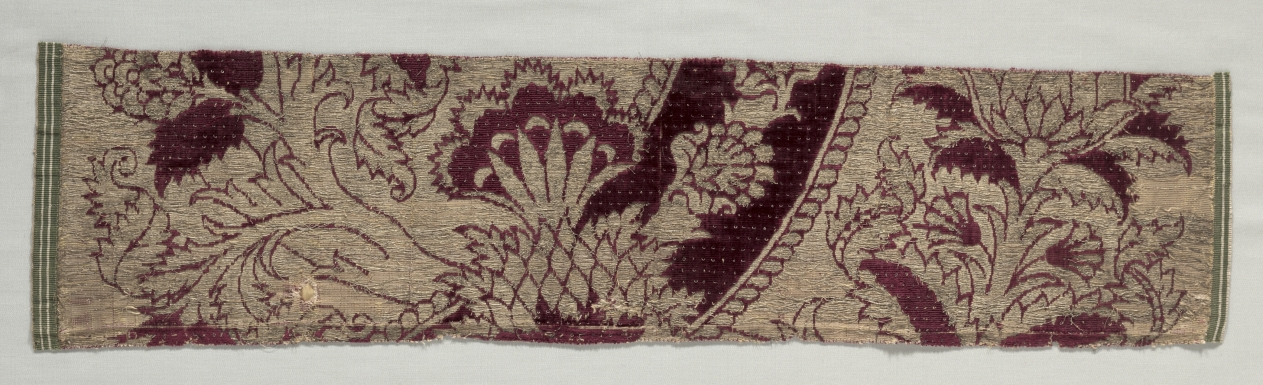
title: Velvet Fragment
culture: Italy, 15th century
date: 1400s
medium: velvet (cut, voided, and brocaded): silk and gold thread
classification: Velvet